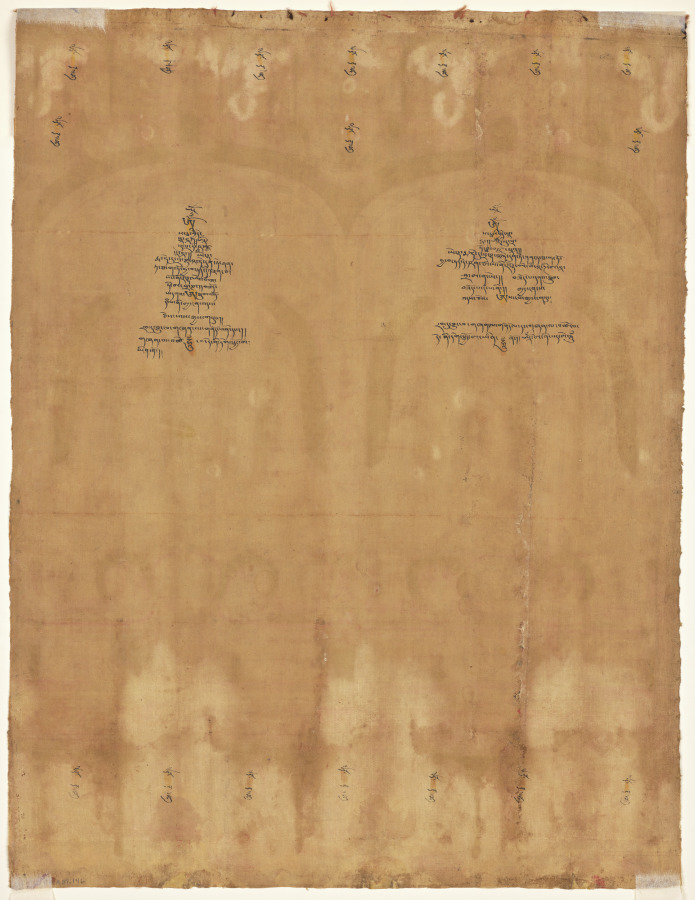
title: Portraits of Two Lineage Masters of the Kagyu Order: Phagmo Drupa (1110–1170) and Tashipel (1142–1210)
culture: Central Tibet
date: c. 1236–1310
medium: Gum tempera on sized cotton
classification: Painting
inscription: [1] ōṃ ŌṂ [2] sa rva vyid [3] svā hā// ōṃ [4] su pra ti ṣṭha vajra [5] svā hā// ye dha [6] rma he tu pra bha vā he tun te śan [7] ta tha ga to hya va tad de ṣan ca [8] yo ni ro dha ye vaṃ vā [9] ti ma [hā] śra [ma] ṇa// bzod [10] pa dka’ A thub bzod [11] daṃ pa ni[//] mya ngan ’das [12] ces sangs rgyas gsung// [13] rab tu byung ba gzhan la gnod pa ni dang// [14] gzhan la ’tshe HŪṂ ba de ni dge sbyong ma [15] yin no//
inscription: [1] ōṃ ŌṂ [2] sa rva vyid svā [3] hā// ōṃ su pra [4] ti ṣṭha vajra svā hā// [5] ye dha rma he tu pra bha vā he tun te śan ta tha ga to [6] hya va tad de ṣan ca yo ni ro dha e vaṃ vā ṭi ma hā [7] śra ma na ye// bzod pa dka’ thub [8] bzod pa daṃ pa ni// mya ngan pa [9] ’das ces A sangs rgyas gsung: [10] rab tu byung ba gzhan la gnod pa dang[//] gzhan la ’tshe ba [11] de ni dge sbyong ma yin HŪṂ no// ōṃ ma ni pad me hūṃ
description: High-level leaders of Buddhist monastic institutions were frequent portrait subjects of early thangka painting (devotional cloth scrolls) in Central Tibet. The lama (Tibetan monk) on the right founded Taklung Monastery in Lhasa, the capital of Tibet, which became an important institutional center of the Kagyu order. He is shown in discourse with his predecessor, whose teacher Gampopa (1079–1153), in turn, is the tiny gray-haired lama centered above them, between the colorful stylized mountain ranges. Their halos, lotus pedestal, and thrones with spitting elephant-trunked crocodiles and rearing griffins elevate them to the level of Buddhas and bodhisattvas. Despite their deification, they are still depicted with individualized facial features.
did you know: The Five Cosmic Buddhas in their six-armed forms are aligned at the top.